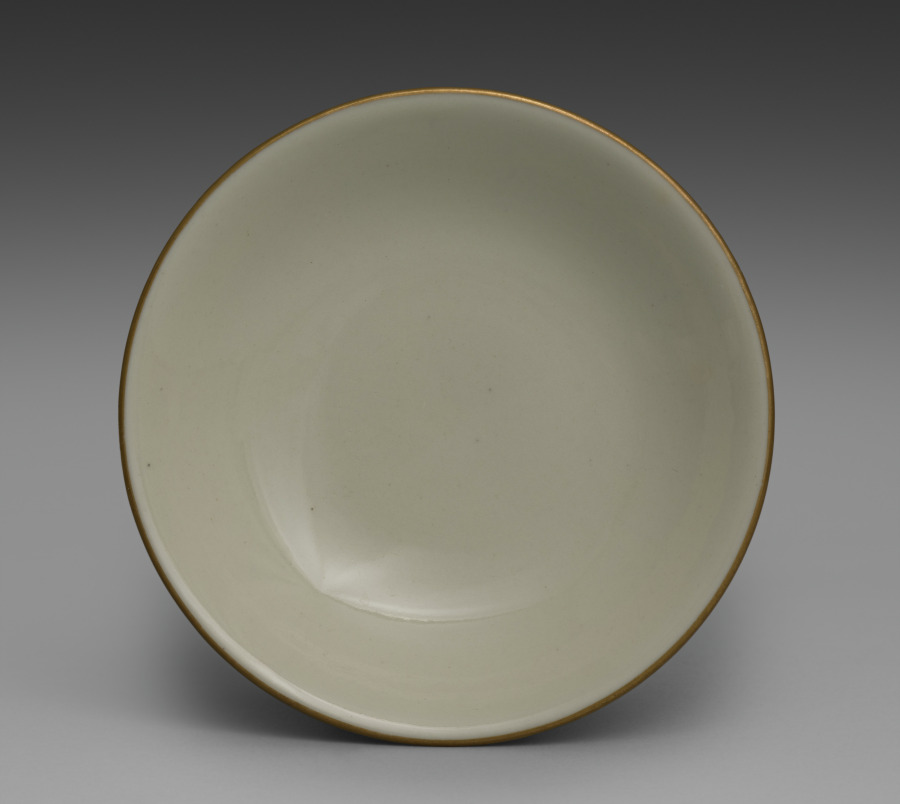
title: Cover for a Bowl from Dining Set with Plum Blossoms and Cracked-Ice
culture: Japan, Meiji period (1868–1912)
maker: Seifū Yohei II (Japanese, 1844–1878)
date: c. 1875–78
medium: Porcelain with molded designs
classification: Ceramic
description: Each item in this set has a delicate low-relief design of flowering plum branches over scattered, intersecting lines meant to resemble the cracked-ice surface of a frozen body of water and is signed on the base in gold pigment. While Yohei II produced many fine works in underglaze blue, like those produced by Kiyomizu Shichibei, he also made works in quite different styles later in his career, from the early 1870 s. In 1873, he was appointed purveyor to the Industrial Center of Kyoto Prefecture, a designation associated with Kyoto’s efforts to reach an international market through the port of Kobe; and from 1875 until his death, he was involved in national-level projects to present Japanese ceramics across the world. It was during this period that Yohei III was apprenticed to Yohei II, and it has been suggested that this set may in fact be an early example of Yohei III’s work, which he signed with his teacher’s name. Decorated with flowers resembling Japanese textile motifs, the set calls to mind the design of Yohei II’s pair of vases with plum blossoms in the Victoria and Albert Museum. Here, the elaborate trees created for a formal public exhibition setting have been translated into the approachable blossoms of the genteel domestic environment. While the designs are consistent across the pieces, each raised flower petal and pistil and each incised line in the ice was done by hand, so the cups, bowls, and dishes are similar yet unique. The bottoms of two boxes once identified the set’s owner, but the information has been deliberately obscured with black ink. However, inscriptions still visible appear to indicate two occasions, once at the end of July 1886 , and once again in June 1916 , when parts of the set were requested from Hokura in Niigata Prefecture. The location corresponds to a neighborhood in the present-day city of Jōetsu. The surname Tsuji 辻 also appears on a paper tag affixed to one of the box cloths. Future research may possibly reveal more about their provenance. A vase by Yohei III in a private collection combines the formal grandeur of the Yohei II vases in the Victoria and Albert Museum with the gentler design of this dining set, placing flowering plum trees against soft, scalloped-edge clouds resembling those in golden screens.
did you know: The dining wares have a creamy white coloration that the four boxes containing them identify as Korean in style.